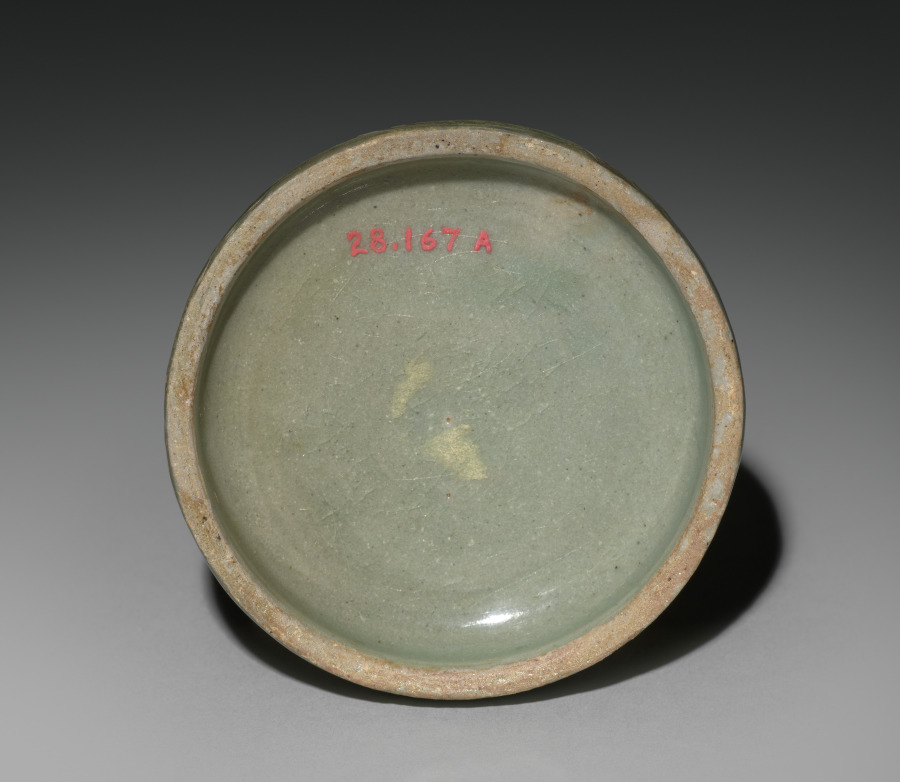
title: Pigment Box (lid)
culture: Korea, Goryeo dynasty (918–1392)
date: 1200s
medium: inlaid celadon ware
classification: Ceramic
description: Celadons, spoons, seals, and bronze mirrors were the most common burial objects in tombs during the Goryeo period (918–1392). Once used to contain colored powder, rouge, and eyebrow gel for makeup, this small container was one of the standard goods that furnished elites' tombs. Both women and men used the grain powder of rice or millet for whitening their skin, safflower extract for rouge, and plant ash or soot for eyebrow gel. Yet, natural-looking makeup seems to have been the most favorable one in Korea according to the travelogue by Xu Jing (1091–1153), the Chinese diplomat who visited Korea in 1123.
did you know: This ceramic container was used to store either incense or cosmetics.